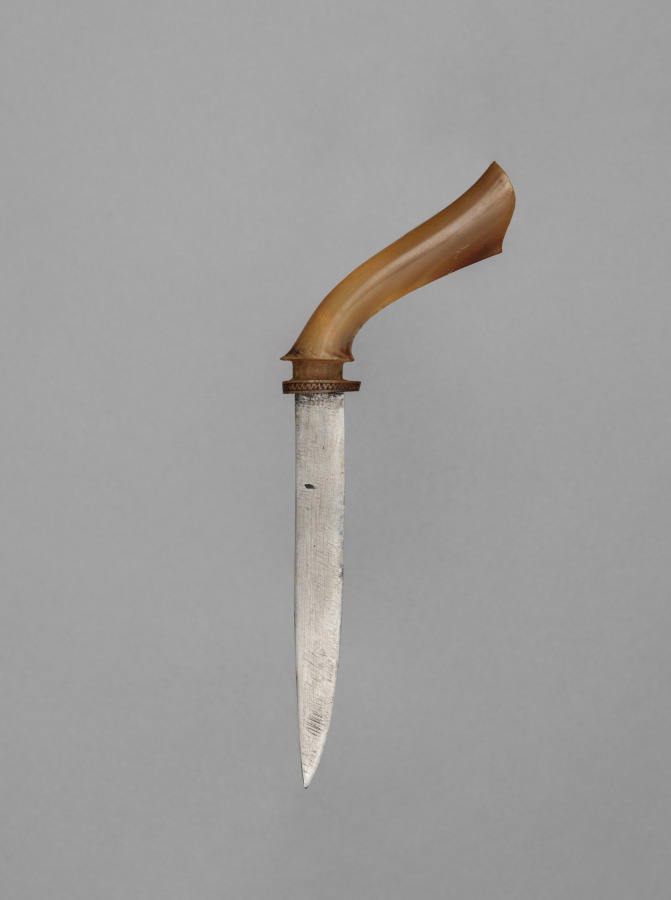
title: Dagger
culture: Sumatra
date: before 1916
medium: Blade: steel; handle: horn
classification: Arms and Armor